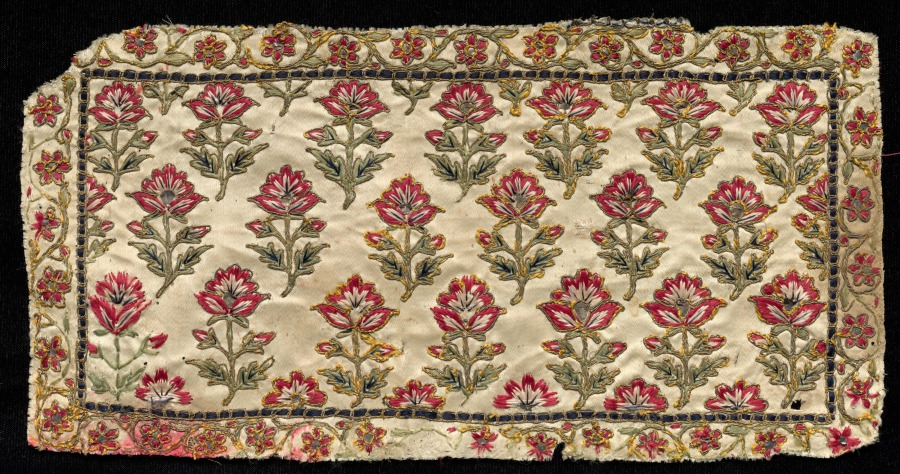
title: Cover for a Jain Manuscript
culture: Western India, Gujarat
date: c. 1800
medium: Silk: satin weave; embroidery, polychrome silk, gold filé, flat metal strip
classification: Embroidery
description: When closed, the horizontal stack of Jain manuscript pages is protected by firm covers on the top and bottom. A donor may commission a luxurious textile to place over or wrap the sacred text to honor it. Textiles with repeated floral plant patterns—these appear to be roses—were popularized at the imperial Mughal court during the mid-1600s, after which they spread throughout India.